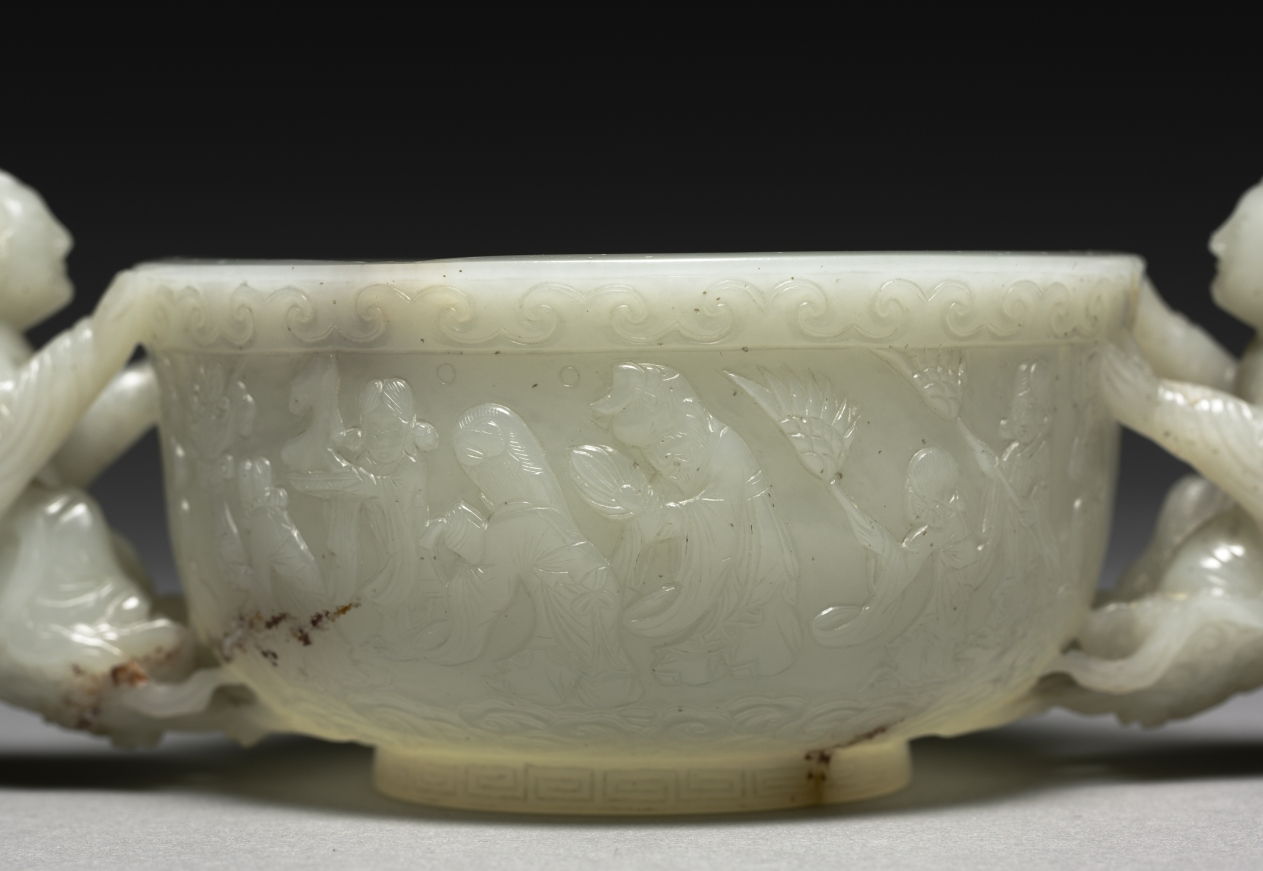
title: Cup with Daoist Figures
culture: China, Qing dynasty (1644–1911), Qianlong period (1736–95)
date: 1736–95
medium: Pale greenish-white jade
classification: Jade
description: During the Qing dynasty, Suzhou’s best products were sent north to the capital. Those that met imperial approval were sometimes graced with Qianlong’s mark, added by calligraphers and jade workers at court. The lack of a Qianlong mark on the Cleveland cup suggests that it might not have reached the court. Previously dated to the Yuan dynasty (1271–1368), new scholarship dates this cup to the Qing period.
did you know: Two female immortals serve as handles, while a Daoist procession with immortals, musicians, and attendants winds around the body of the cup.